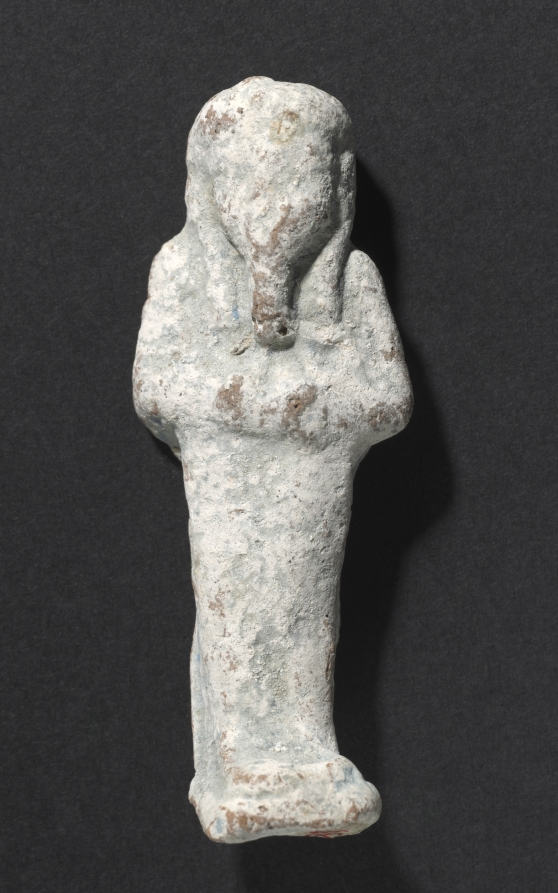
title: Shawabty of Ditamenpaankh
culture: Egypt, Late period (715–332 BCE), Dynasty 25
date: 715–656 BCE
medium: terracotta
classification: Funerary Equipment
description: High demand for shawabtys in the Late Period, a time when as many as 400 or more shawabtys were placed in the tomb with the deceased, gave rise to a specialized container for storing them: the shawabty box. This example is inscribed for the lady of the house, Ditamenpaankh, and was probably one of a pair originally made for her. The single-masted boat on the box's lid is perhaps an allusion to the pilgrimage of the deceased to the holy city of Abydos, the cult city of Osiris, king of the dead. The shawabtys inside are crude, mass-produced examples cast in an open mold. Made of terracotta, their blue paint imitates more costly shawabtys made of faience. As for the shawabty spell, it has been removed from its traditional location on the shawabty's front and relocated onto the sides of box, where it needed only to be written once, thus expediting production.